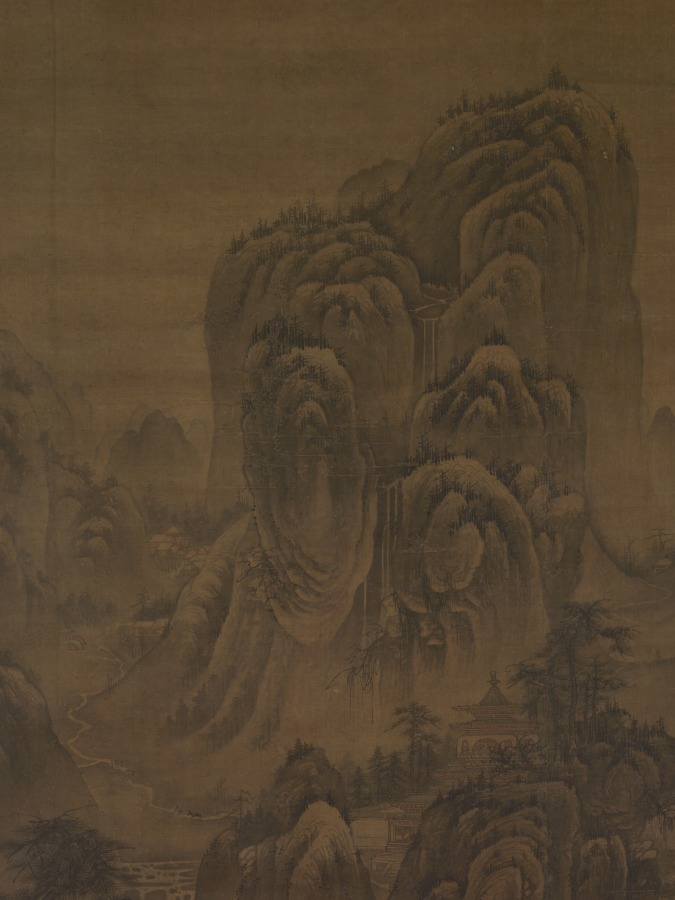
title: Landscape in the Style of Juran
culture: China, Ming dynasty (1368–1644)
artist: attributed to Liu Du (Chinese, active c. 1628-after 1653)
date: 1368–1644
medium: Hanging scroll mounted as a panel; ink and slight color on silk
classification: Painting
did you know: There is a tiny apocryphal signature under the overhanging rocks on the lower left side.